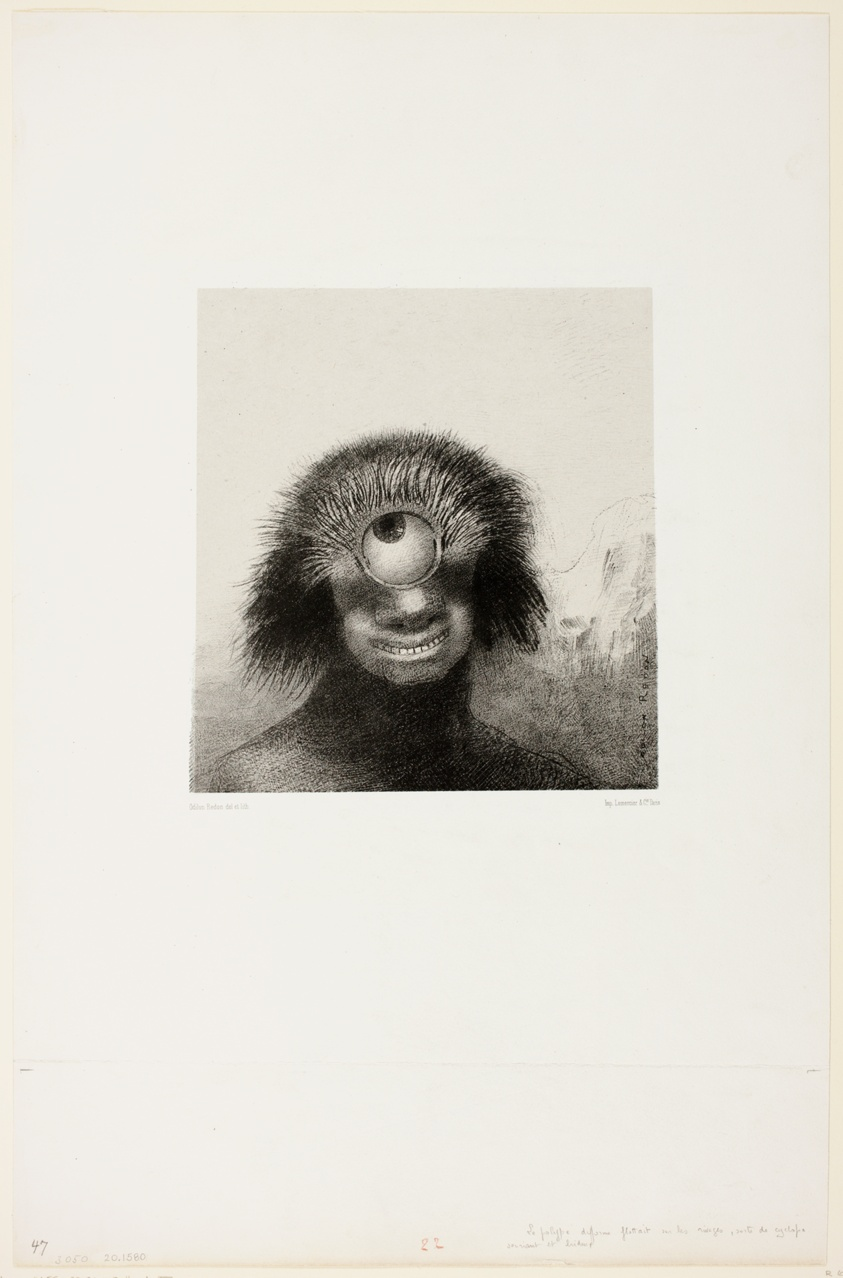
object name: Print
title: The Misshapen Polyp Floated on the Shores, a Sort of Smiling and Hideous Cyclops, plate 3 of 8 from "Les Origines"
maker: Odilon Redon (French, 1840-1916)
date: 1883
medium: Lithograph in black on light gray China paper, laid down on white wove paper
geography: France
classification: lithograph; print; prints and drawing; paper